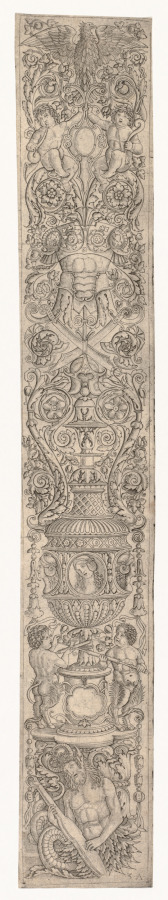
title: Ornament Panel: Triton and Two Infant Satyrs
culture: Italy, 15th century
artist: Zoan Andrea (Italian)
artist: after Giovanni Pietro da Birago (Italian)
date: c. 1505–15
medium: engraving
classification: Print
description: Printed ornamental columns—such as these flanking the portrait of Henry II—were probably colored and used for interior decorations. The printed panels may have also served artists and craftsmen creating similar patterns in other materials, including wood, stone, or metal. They have been imaginatively integrated into the display on this wall because their intricate designs feature pieces of armor and mythical creatures that echo those in the works around them.